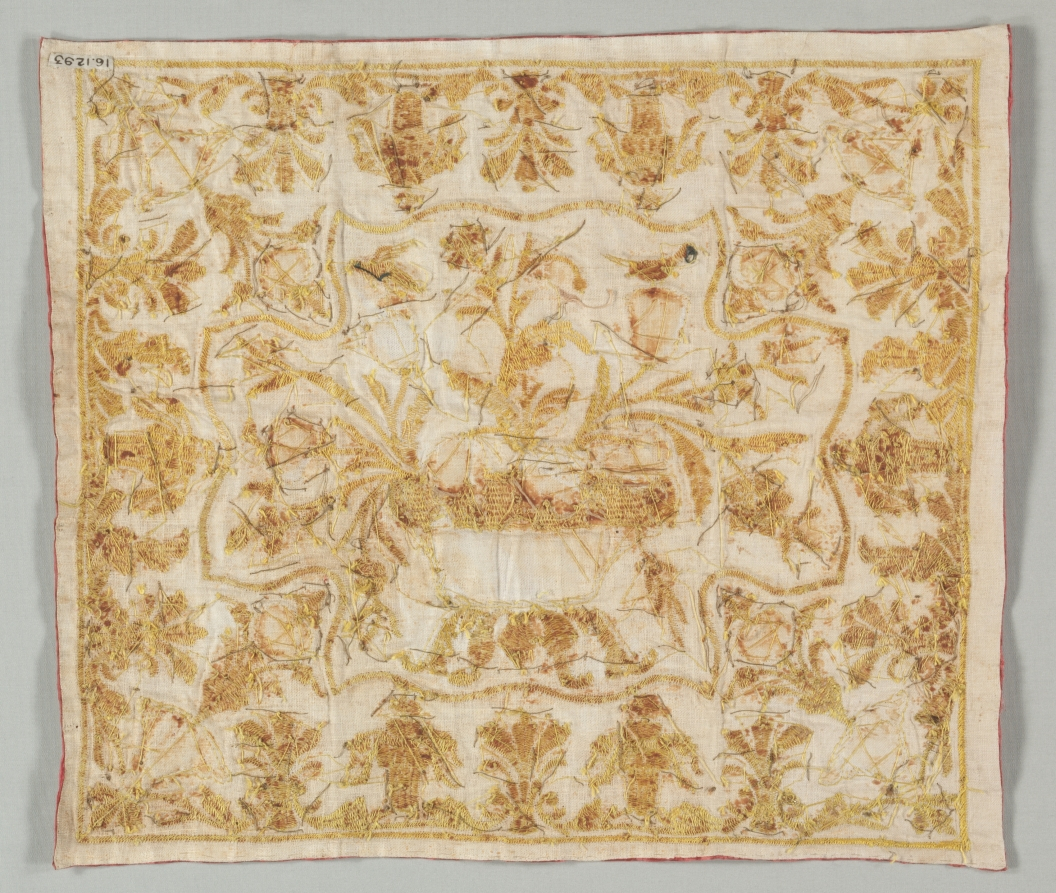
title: Embroidered Textile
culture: Turkey, 18th-19th century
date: 18th-19th century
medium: embroidery: gold filé around silk core laid over cotton, couched at edges in silk, and sequins on silk ground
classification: Embroidery